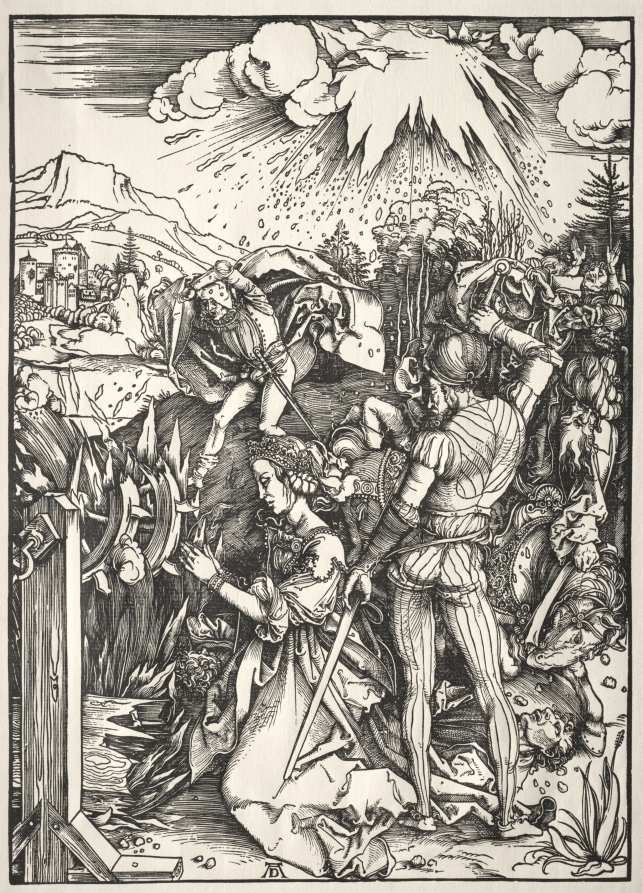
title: The Martyrdom of St. Catherine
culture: Germany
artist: Albrecht Dürer (German, 1471–1528)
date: c. 1497–99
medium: woodcut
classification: Print